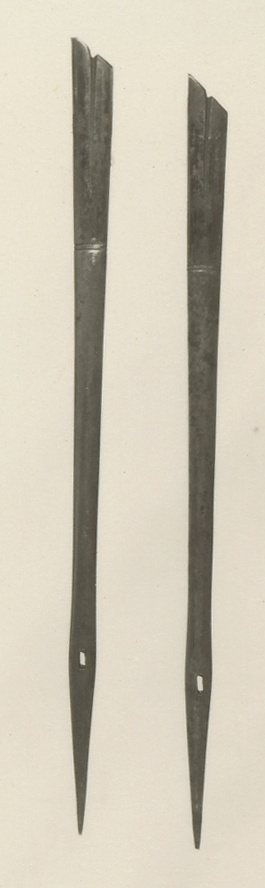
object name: Arms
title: Two Awls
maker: German (Saxon)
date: late 16th century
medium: Iron, silver, and leather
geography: East Germany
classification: arms and armor, miscellaneous; arms and armor; arms